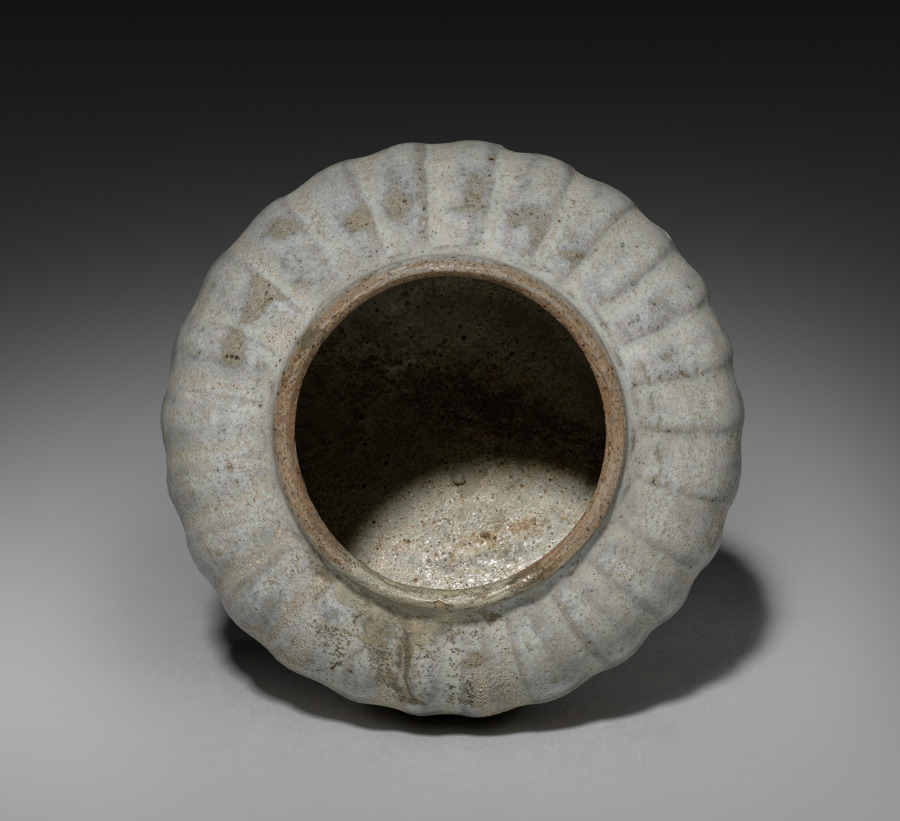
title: Jar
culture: Siam, Sawankhalok ware, late 13th-14th Century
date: late 1200s-1300s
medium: stoneware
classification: Ceramic